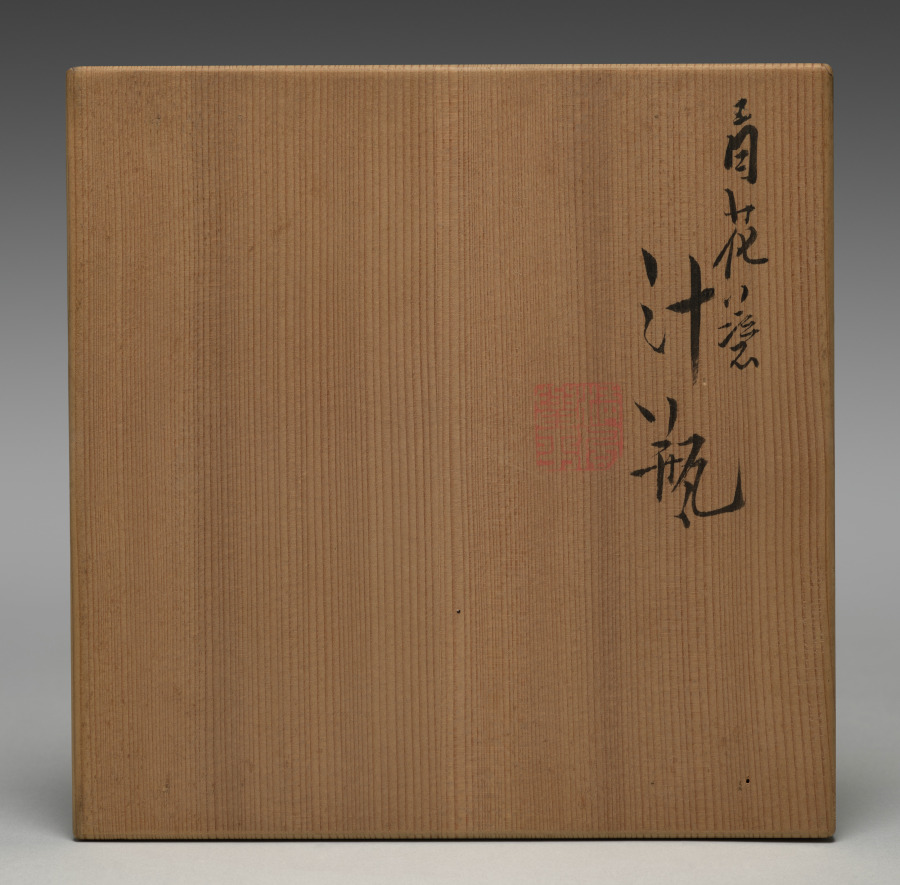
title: Sake Pourer with Chrysanthemum, Orchid, and Plum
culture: Japan, Meiji period (1868–1912)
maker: Seifū Yohei III (Japanese, 1851–1914)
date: c. 1887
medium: Porcelain with underglaze blue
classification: Ceramic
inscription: Artist's signature in underglaze blue on the base.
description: Seifū Yohei II and his successor, Seifū Yohei III, trained in ink painting. Their brush skills are seen in their underglaze cobalt blue designs. Orchid, bamboo, chrysanthemum, and plum, appearing on Yohei III’s sake pourer, are known as the Four Gentlemen. They symbolize the virtues of humility, integrity, endurance, and perseverance.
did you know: This sake pourer is decorated with the Chinese theme of the Four Nobles, in which the qualities of a good person are represented by plant.